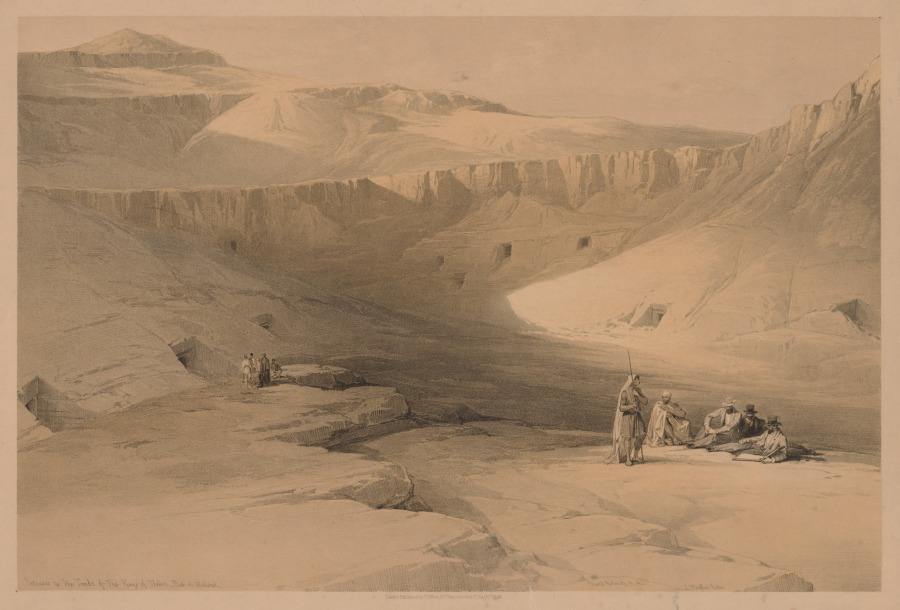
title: Egypt and Nubia: Volume II - No. 34, Entrance to the Tombs of the Kings of Thebes, Biban-el-molook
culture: England, 19th century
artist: Louis Haghe (British, 1806–1885)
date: 1838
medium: color lithograph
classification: Print